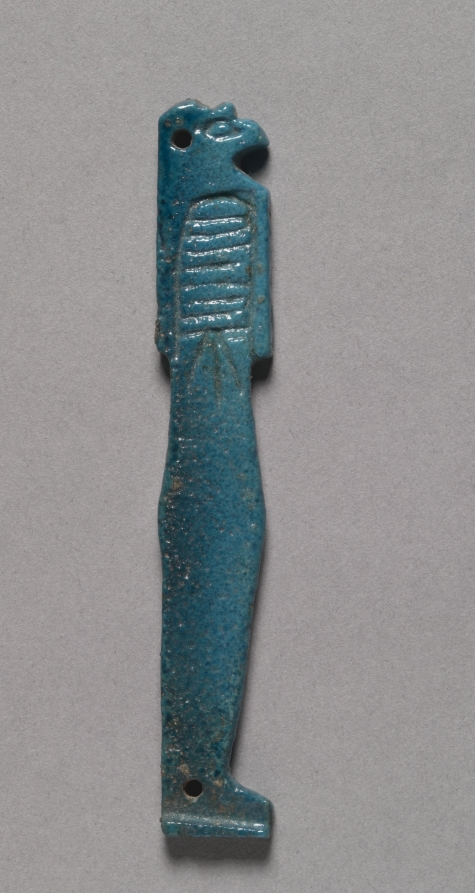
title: Son of Horus Amulet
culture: Egypt, Late period (715–332 BCE), Dynasty 26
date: 664–525 BCE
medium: bright turquoise faience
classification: Amulets